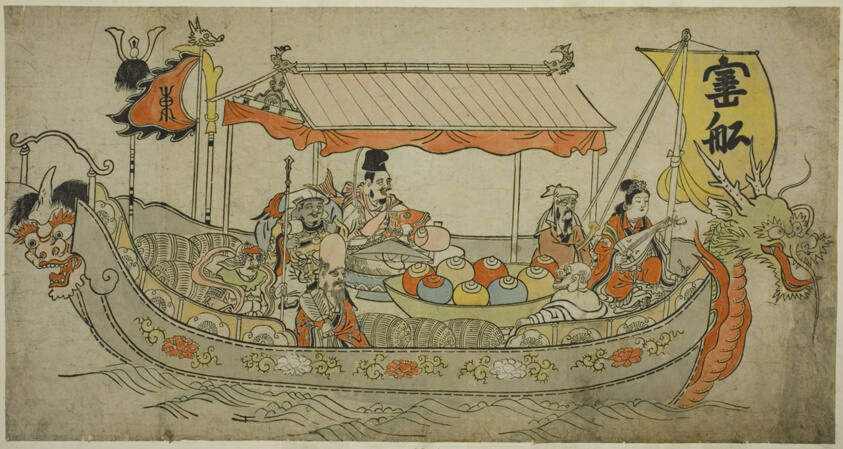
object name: Print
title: The Treasure Ship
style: Japanese (culture or style)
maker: Attributed to Furuyama Moromasa; Japanese, c. 1712-1772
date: c. 1712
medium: Hand-colored woodblock print; horizontal o-oban, sumizuri-e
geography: Japan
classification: woodblock print; print; asian art